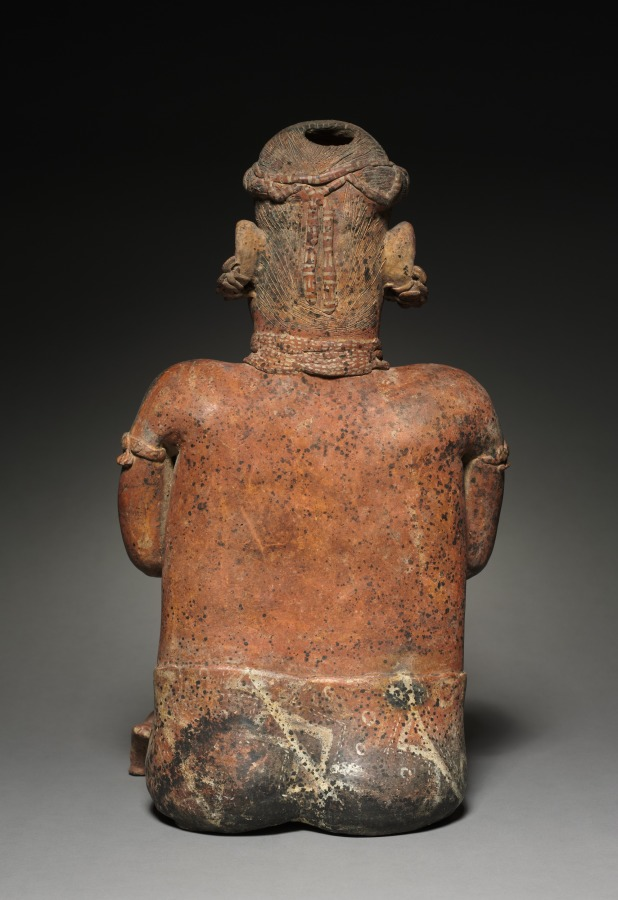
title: Female Seated Figure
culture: Mexico, Nayarit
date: 100 BCE–300 CE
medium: ceramic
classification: Ceramic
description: This couple-extremely fine examples of their kind-may commemorate the marriage of an important person, such as a chief, but could also represent siblings of a chiefly family. Whatever their relationship, their unity is conveyed by their physical similarities, including their jewelry, which marks high social station. The female is unusual in nursing an infant, likely a reference to generational renewal and the continuation of noble bloodlines. The significance of the male’s activity-beating a turtle-shell drum- is not understood.